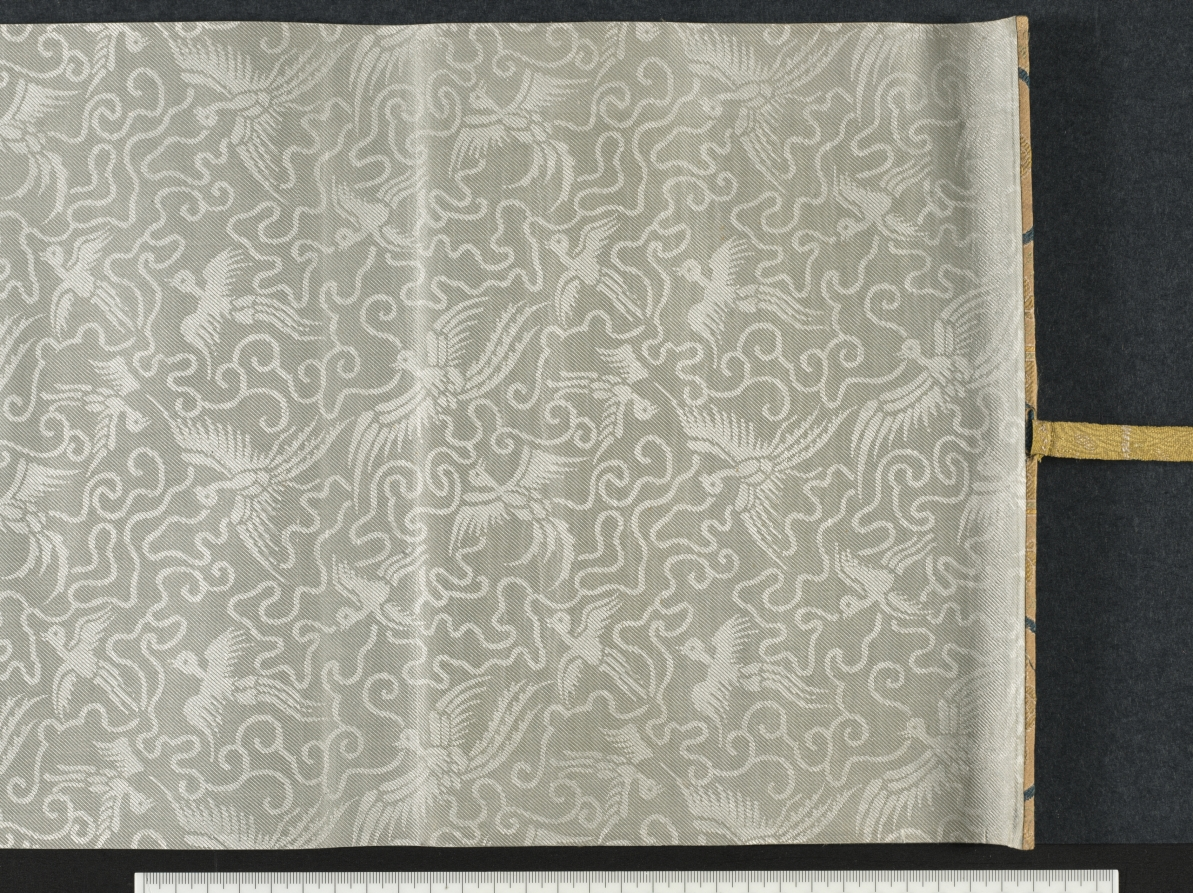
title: The Lantern Night Excursion of Zhong Kui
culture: China, Yuan dynasty (1271-1368)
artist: Yan Hui (Chinese, active 1270–1310)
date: late 1200s–early 1300s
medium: handscroll; ink and slight color on silk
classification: Painting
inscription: Artist's signature [and probable seal]: Yan Qiuyue 顏秋月 Title on frontispiece and 1 seal of Niu Shuyu 鈕樹玉 (1760–1827): Qiuyue mohuan 秋月墨幻 [Qiuyue's Ink Fantasy]. 31 additional seals: 2 of Yang Shiqi 楊士奇 (1365–1444); 2 of An Guo 安國 (1481–1534); 8 of Xiang Yuanbian 項元汴 (1525–1590); 2 of Geng Zhaozhong 耿昭忠 (1640–1686); 4 of Pu Tung 溥侗 (1870–1952); 7 of Tan Jing 譚敬 (1911–1991); 1 of Liu Ting-chih (20th c.); 5 unidentified.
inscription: An inscription by Zizhi Shanren 紫芝山人 [probably Jiang Hui 蔣惠], dated 1389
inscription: An inscription by Wu Kuan 吳寬 (1436–1504)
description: Here, the demon queller Zhong Kui leads a nightly procession of street entertainers with bare, muscular bodies and demonic faces. Some wear shabby clothes, and all perform stunts and tricks to astound and scare the viewer. In fact, a New Year custom in cities of southeast China had the poor, disguised as demons, process through the streets and play their tricks to clear households of evil spirits and welcome the spring. From right to left, a demonic figure leads the procession and beats a drum; another lifts a large rock; one stands on his hands trying to drink; one balances a jar on his elbow; three hold and wield weapons; one carries a folded chair covered by a cow’s skin; another holds Zhong Kui’s qin (zither), books, brush, and inkstone. At the end of the scroll, two figures offer a cup and bottle of wine to Zhong Kui, who lifts his hand in command.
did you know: Zhong Kui was an ancient ghostbuster.